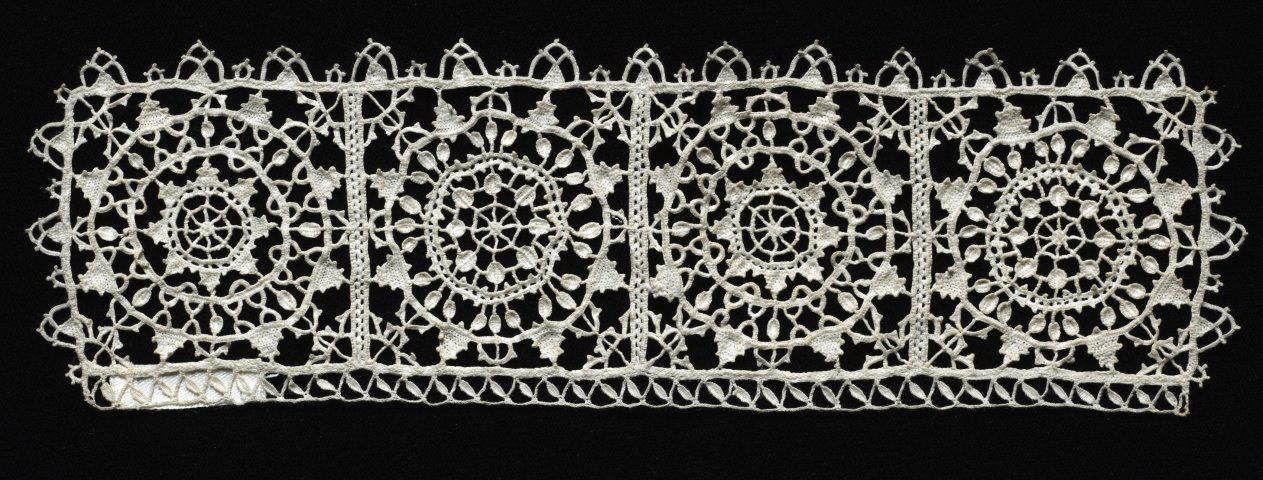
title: Lace Cuff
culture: Italy, Genoa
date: 1550–99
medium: Needle lace (reticella)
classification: Lace